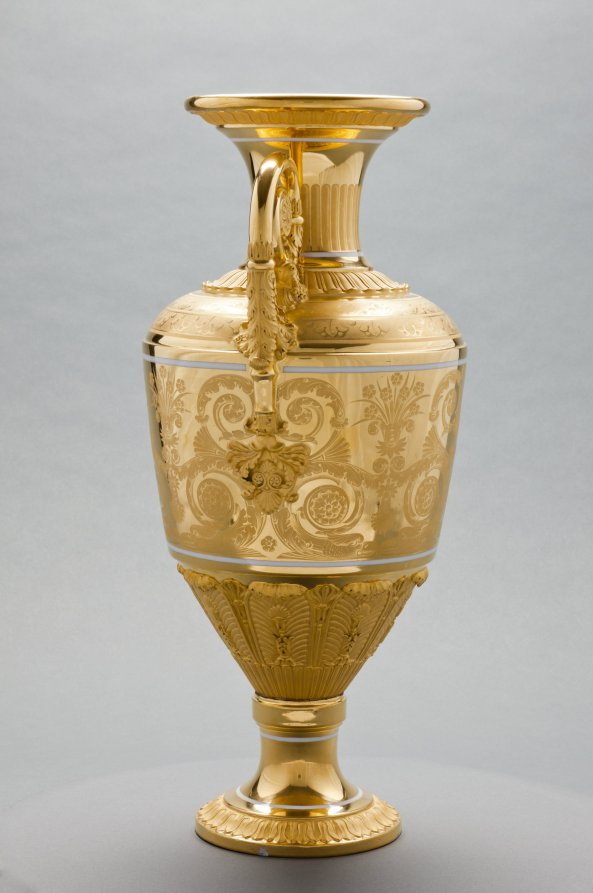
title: Vase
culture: Russia, St. Petersburg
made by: St. Petersburg Imperial Porcelain Factory (Russian)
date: c. 1820–1830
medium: gilt porcelain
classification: Ceramic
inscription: inscribed: "Moreau" in gold near lip.